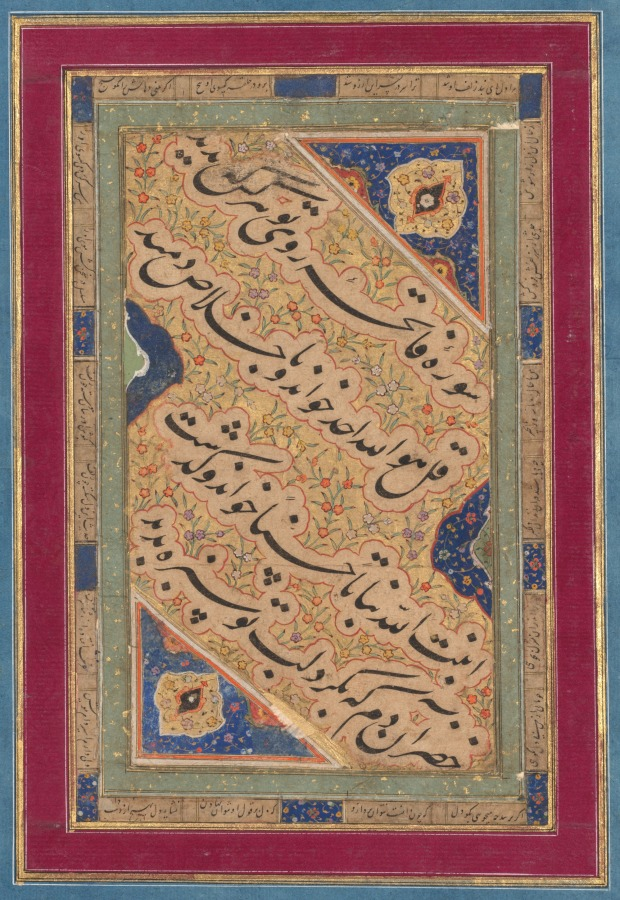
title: Calligraphy of Lyrical Quatrains (verso)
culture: Mughal India, probably Lucknow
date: mid-1700s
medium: Gum tempera, ink, and gold on paper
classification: Calligraphy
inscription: verso: Persian verses in nasta‘liq script. Whoever set eyes on the Opening Verses of your face recited “Say He is the Only God” and breathed it out in pure sincerity./ “God has made her grow in purity and beauty,” So recited and passed by Khizr, the moment he saw the green [pubescent] sprouting around your lips.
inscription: verso: Persian verses in top horizontal border, right to left, in nasta‘liq script. My heart became shackled to her tresses;/ You have lost your head in fulfilling this desire./ Go and become entangled in her tresses./ If you see her mouth, do not say a word.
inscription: verso: Persian verses in bottom horizontal border, right to left, in nasta‘liq script. If she asks you what you desire, say “your heart.”/ Since once she knows it, one could never banish her from one’s heart./ For one cannot assure one’s heart based on her words of promise;/ It is not fitting that one should lose one’s heart for naught.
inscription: verso: Persian verses in right vertical border, top to bottom, in nasta‘liq script: From the anguished mood and state of this sorrowful heart,/ Narrate down the story as you brush down her tresses [conjectural]/ Of me, in an unfit state, shackled and in chains/ How I fare in that stifling prison./ If you go and seek her out in that abode/ Once you find her, you should say of me, the heartbroken.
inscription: verso: Persian verses in left vertical border, bottom to top, in nasta‘liq script: I have a heart ensnared by her tresses/ Exiled in foreign lands [. . .] of her tresses/ The tale of this broken-hearted soul, like disheveled hair/ Bring to her ears in a well-composed manner, like well-arranged hair/ Enchain her tresses in your speech/ Brush her locks behind her for a while.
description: Floral sprigs illuminate the central calligraphic work, and paired verses have been written in smaller script all around the border. All the verses are about the beauty of—and longing for—the beloved.